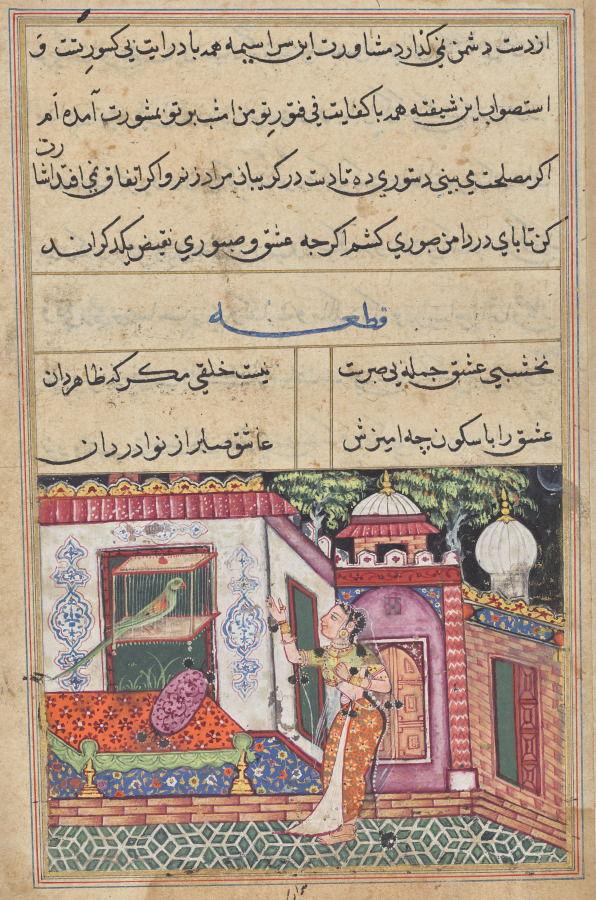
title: The Parrot Addresses Khujasta at the Beginning of the Eleventh Night, from a Tuti-nama (Tales of a Parrot)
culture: Mughal India, court of Akbar (reigned 1556–1605)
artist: Banavari 2 (Indian, active 1550s-1590s)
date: c. 1560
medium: gum tempera, ink, and gold on paper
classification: Painting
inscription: banwārī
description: When the lover of the ocean—the sun—entered his place of retirement in the west and the beloved of the stars— the moon—came out of the bride’s apartment in the east, Khujasta with eyes wet like the sea and tears like brilliant gems went to Tuti to ask his permission to leave. . . . Eleven days and nights have come and gone since Khujasta fell for a local prince. Each night, having prepared herself for a lovers’ rendezvous, her husband’s pet parrot has beguiled her into staying up all night listening to his stories at home. On this night, he tells her that it is good that she has sought his advice on going out, for “[Anyone] who seeks counsel in regard to his affairs and secures advice on his problems will see exactly what the Brahman saw.” Unable to stem her curiosity, she asks the parrot what he saw.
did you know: Two painters named Banavari are known to have been active during the Akbar period.